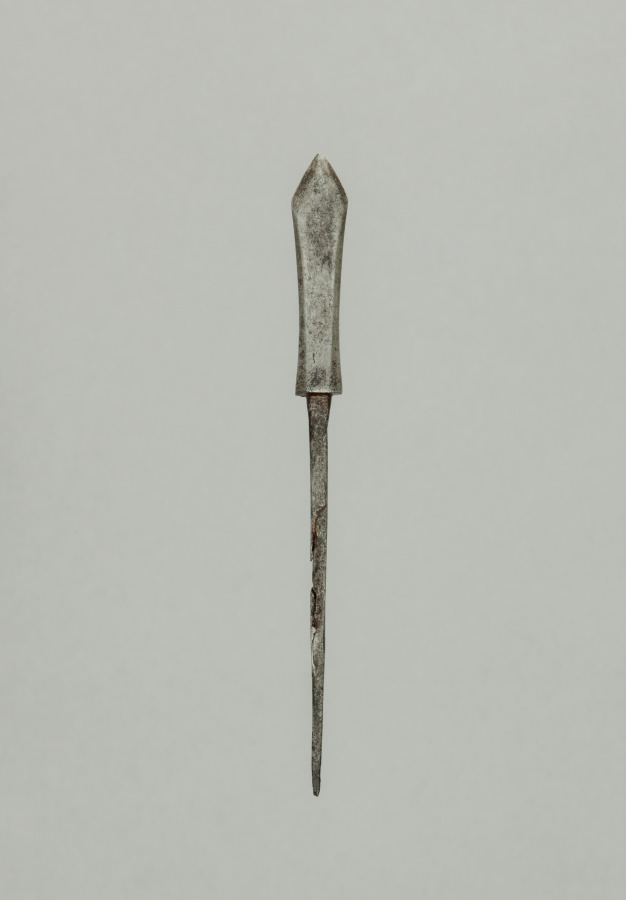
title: Arrow Point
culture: Japan, Edo period (1615–1868)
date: 1700s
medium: steel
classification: Arms and Armor